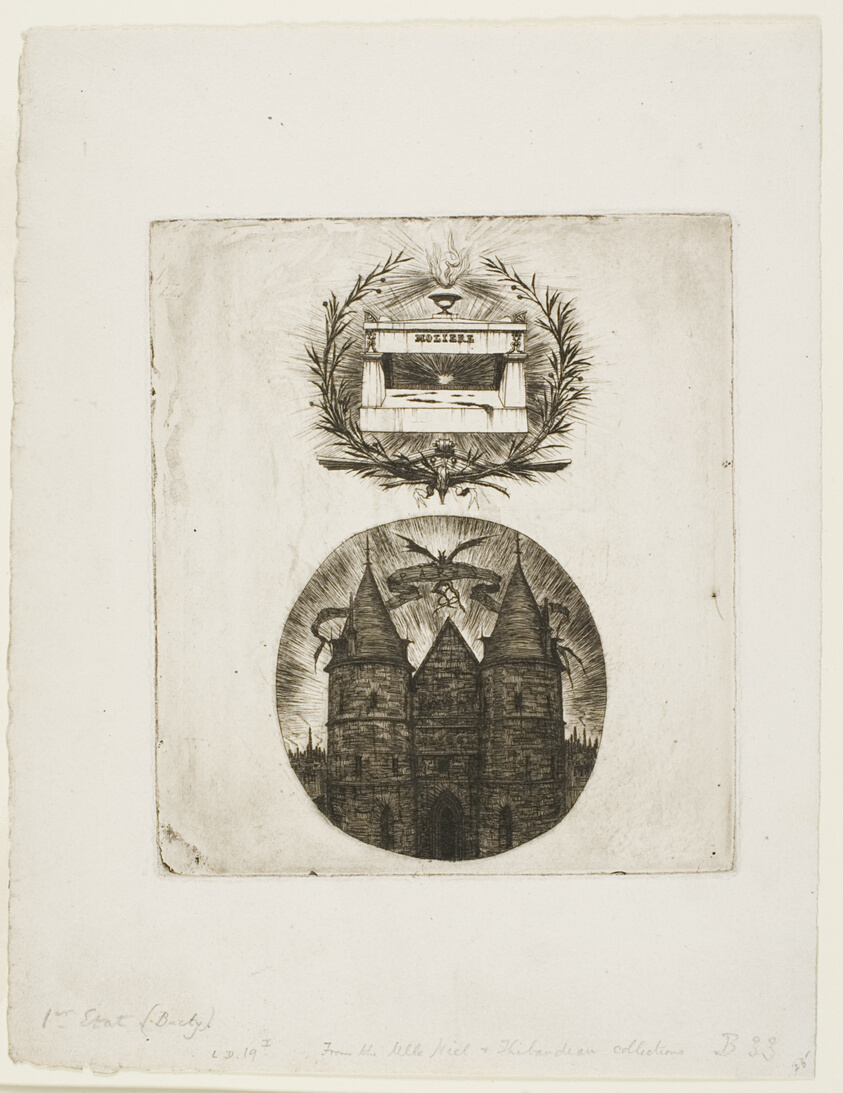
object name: Print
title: Molière's Tomb, Père-Lachaise Cemetery, Paris and the Old Gate of the Palais de Justice, Paris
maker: Charles Meryon (French, 1821-1868)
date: 1854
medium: Etching and drypoint on ivory wove paper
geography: France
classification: etching; print; prints and drawing